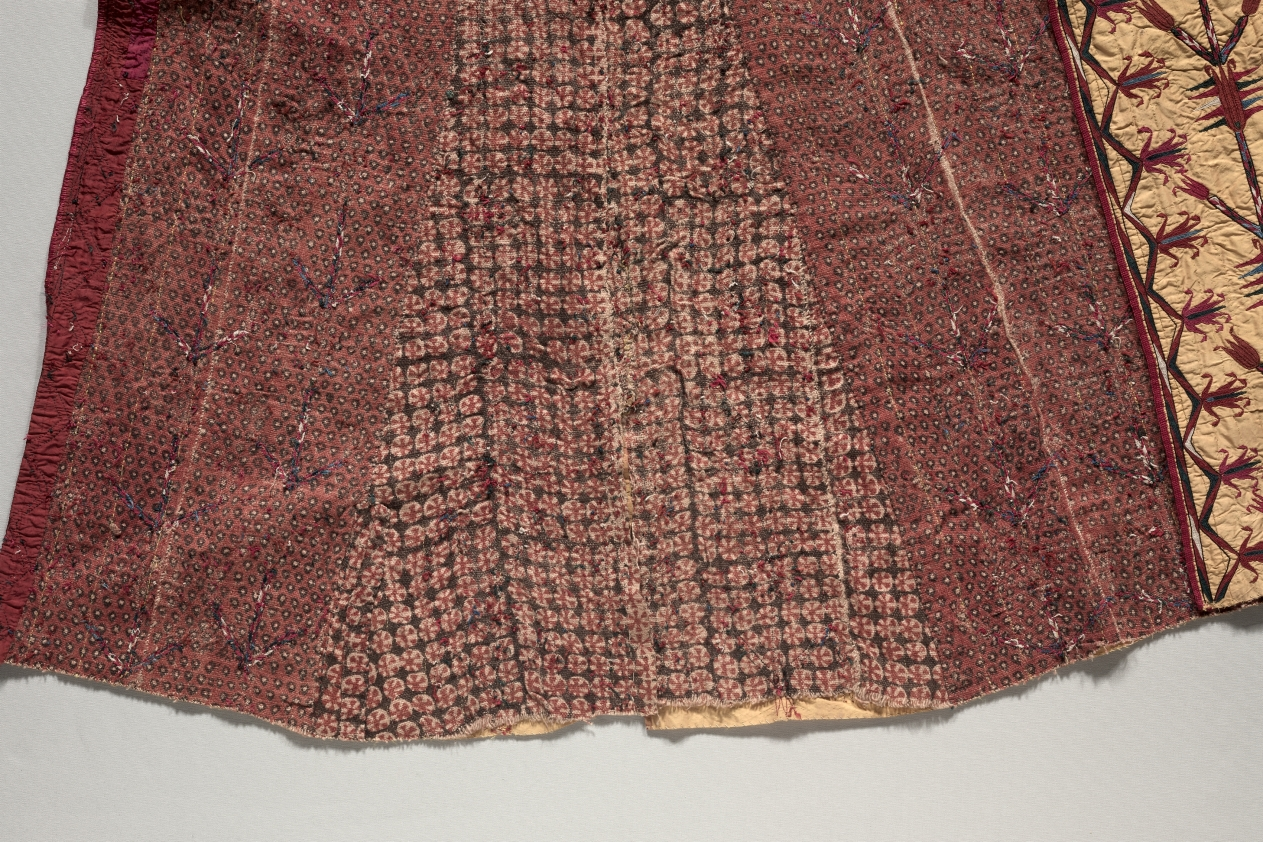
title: Woman's cloak (chyrpy)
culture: Uzbekistan, Bukhara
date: 1800s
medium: Cotton; silk: embroidery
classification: Garment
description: This yellow silk is richly embroidered in the button-hole stitch. The pattern of this woman's cloak resembles one of the patterns on the so-called Bokhara stripes used for fixing tents. The garment is lined with printed cotton fabric, which seems to be a product of India or Persia, and very crude block-printed cotton fabric with simple allover patterns of red and black dots and circular medallions.